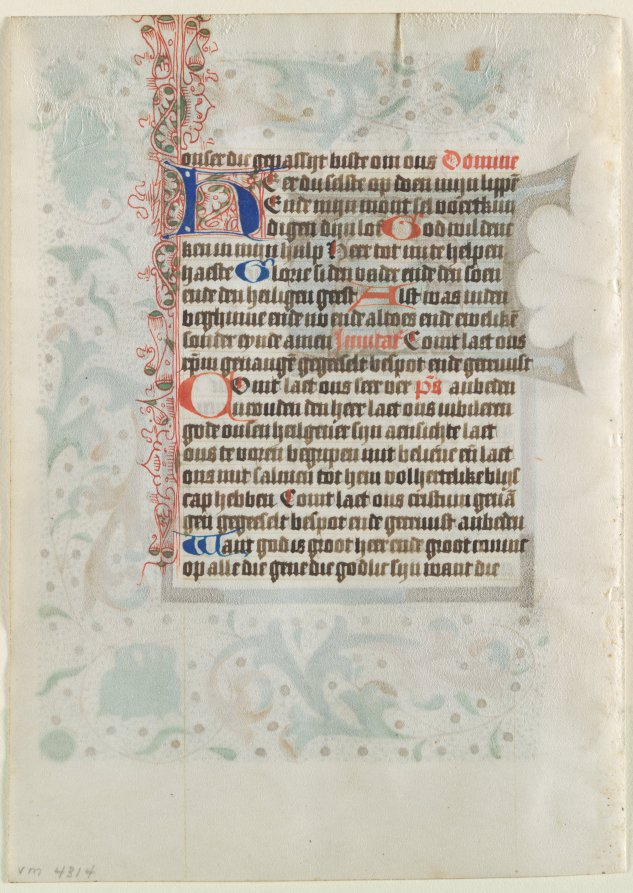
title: Leaf Excised from a Book of Hours: Decorated Initial H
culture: North Netherlands, Zwolle(?), 15th century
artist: related to Masters of the Zwolle Bible (Netherlandish)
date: c. 1470–1480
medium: ink, tempera, and gold on vellum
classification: Manuscript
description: The difficulty in localizing Dutch manuscripts of the second half of the 15th century is formidable. Many shared or exchanged characteristics are found, particularly in terms of page layout, border decoration, and initial design. The present leaf contains borders embellished with brightly colored flowers (columbines) and acanthus leaves filled in with gold bezants, tiny green leaves, and little black dots. Though different in palette, these elements bear closest resemblance to borders and initials produced by a group of artists associated with the Zwolle Bible (Utrecht, Universiteitsbibliotheek, MS. 31). The original illuminators are believed to have worked within the Monastery of the Canons Regular at Agnietenberg. This leaf is painted in an associated style by an artist who must have been familiar with the Zwolle group.